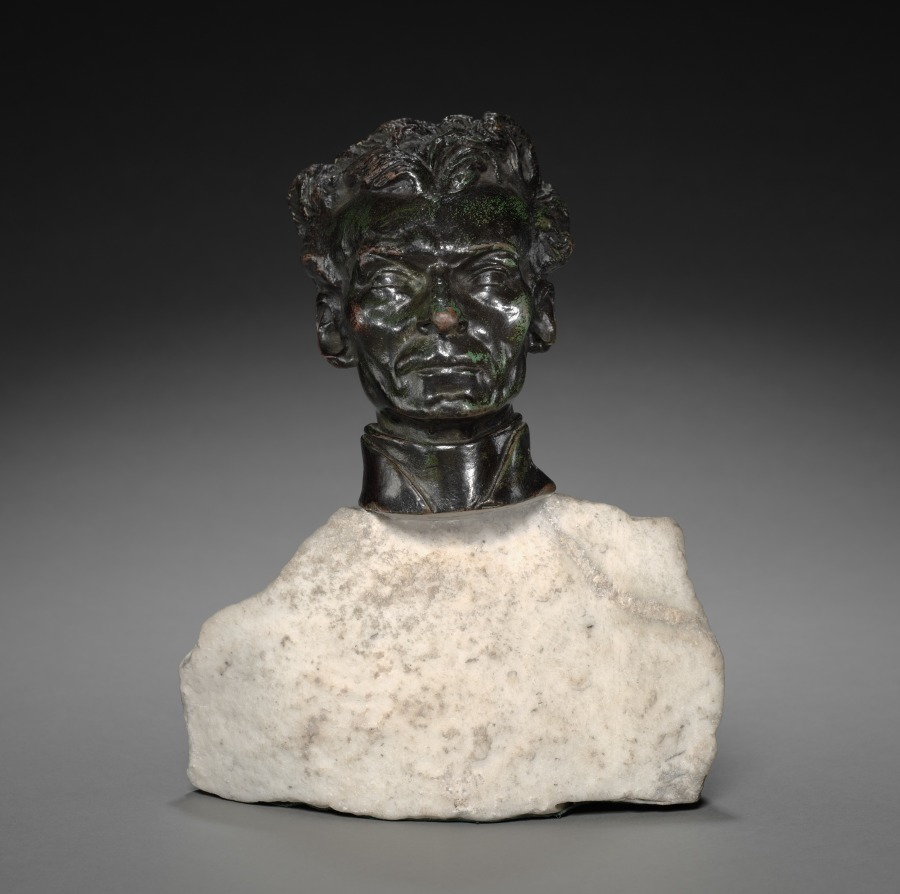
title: Father Pierre-Julien Eymard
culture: France, 19th century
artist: Auguste Rodin (French, 1840–1917)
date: ca. 1863 (original model)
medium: bronze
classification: Sculpture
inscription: Signed on left side of collar: "Rodin"; on base, back right: "A. Rodin"